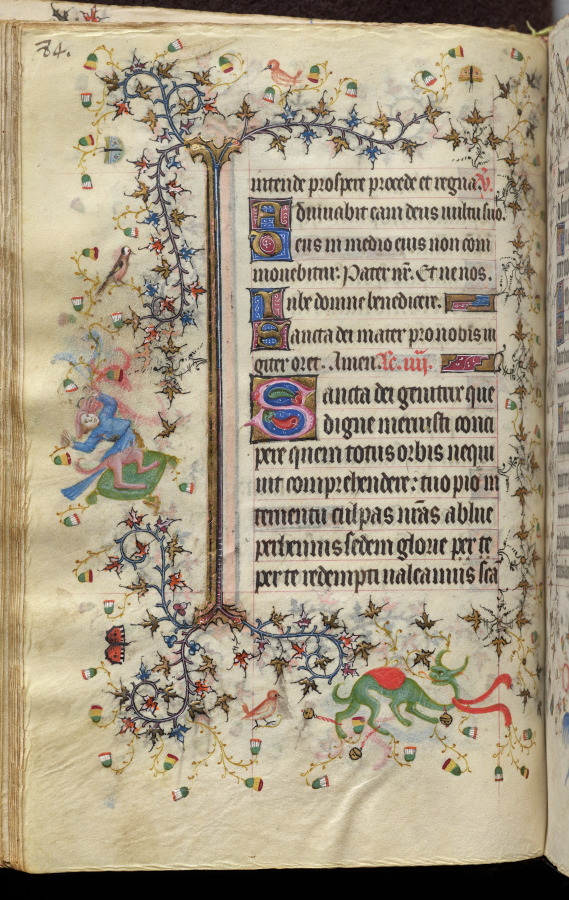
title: Hours of Charles the Noble, King of Navarre (1361-1425): fol. 42v, Text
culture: France, Paris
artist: Master of the Brussels Initials and Associates (French)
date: c. 1405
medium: ink, tempera, and gold on vellum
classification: Bound Volume